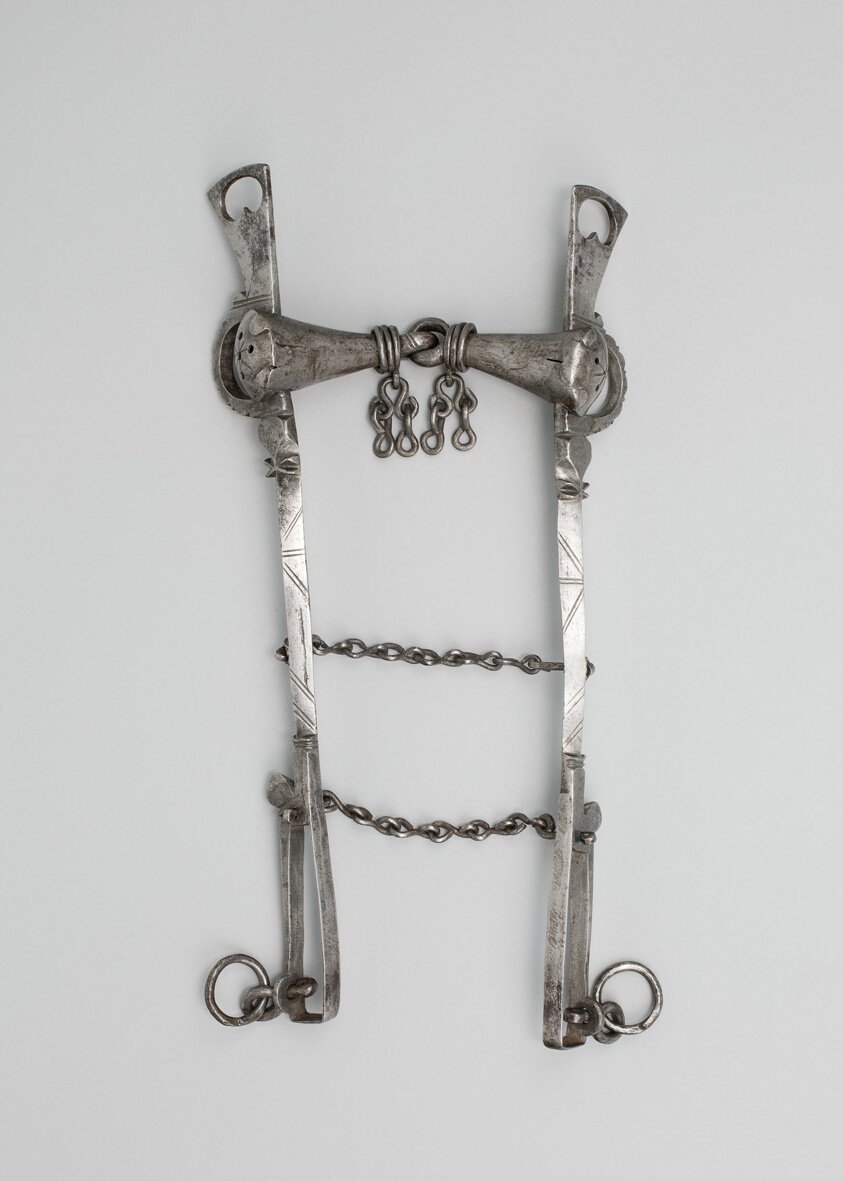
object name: Armor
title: Curb Bit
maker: German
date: 1510/20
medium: Iron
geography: Germany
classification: horse equipment; armor; arms and armor